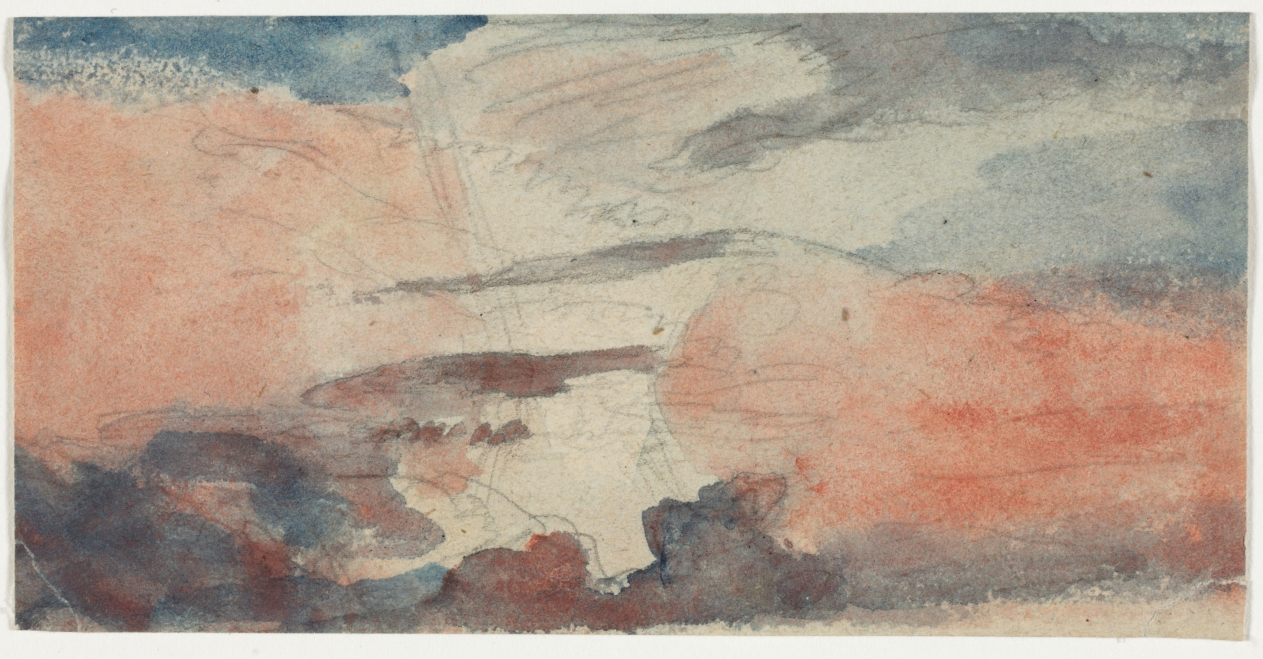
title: Cloud Study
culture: England, 19th century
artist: Anonymous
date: 1800s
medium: watercolor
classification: Drawing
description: Many English watercolorists of the period were especially interested in capturing natural effects of the landscape, such as cloud formations. Such studies were of particular interest to the French Impressionists.